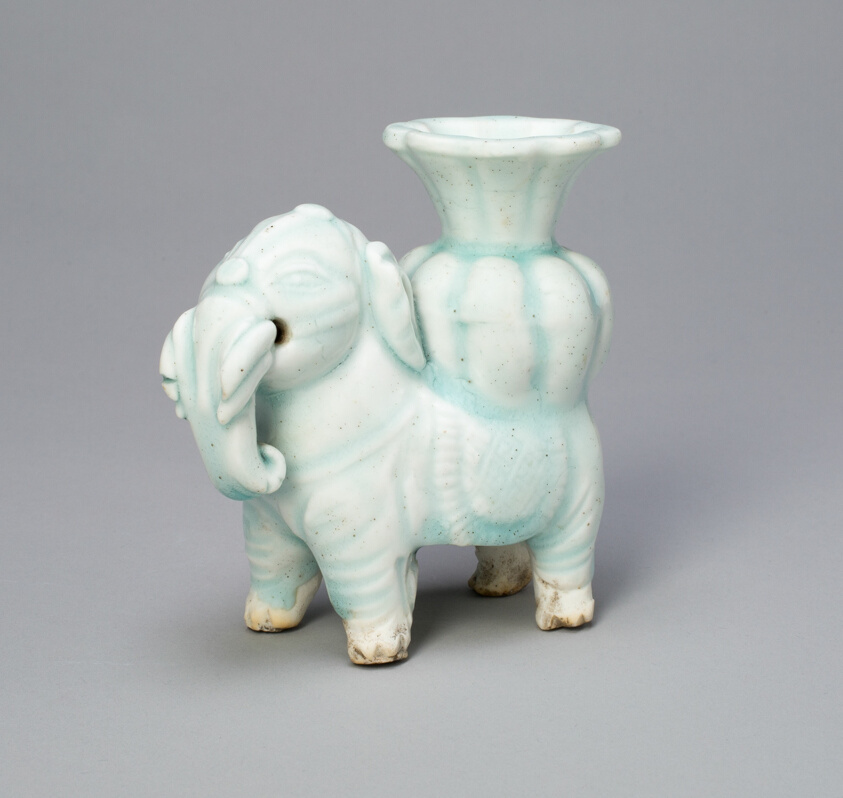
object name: Vessel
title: Joss-Stick Holder in the Form of an Elephant Holding a Lobed Vase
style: Chinese (culture or style)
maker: China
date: Yuan dynasty (1271–1368)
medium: Qingbai ware; glazed porcelain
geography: China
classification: vase; vessel